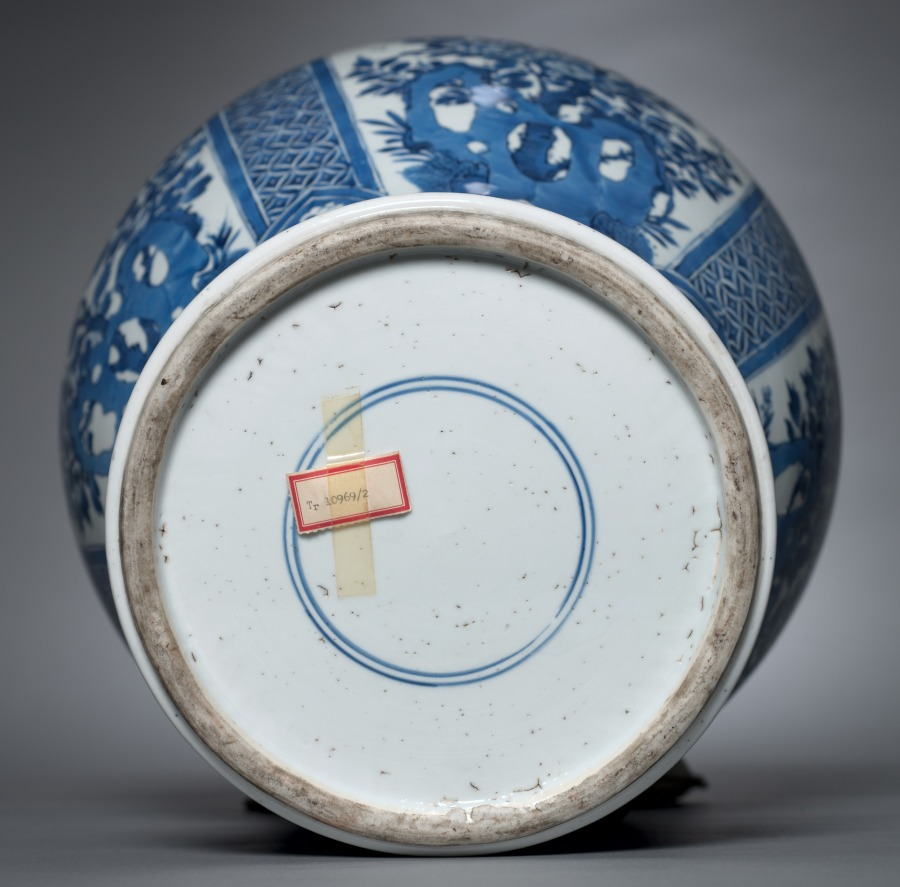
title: Vase with Cover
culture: China, Jiangxi province, Jingdezhen kilns, Qing dynasty (1644–1911), Kangxi reign (1662–1722)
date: 1662–1722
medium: porcelain with underglaze blue decoration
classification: Ceramic